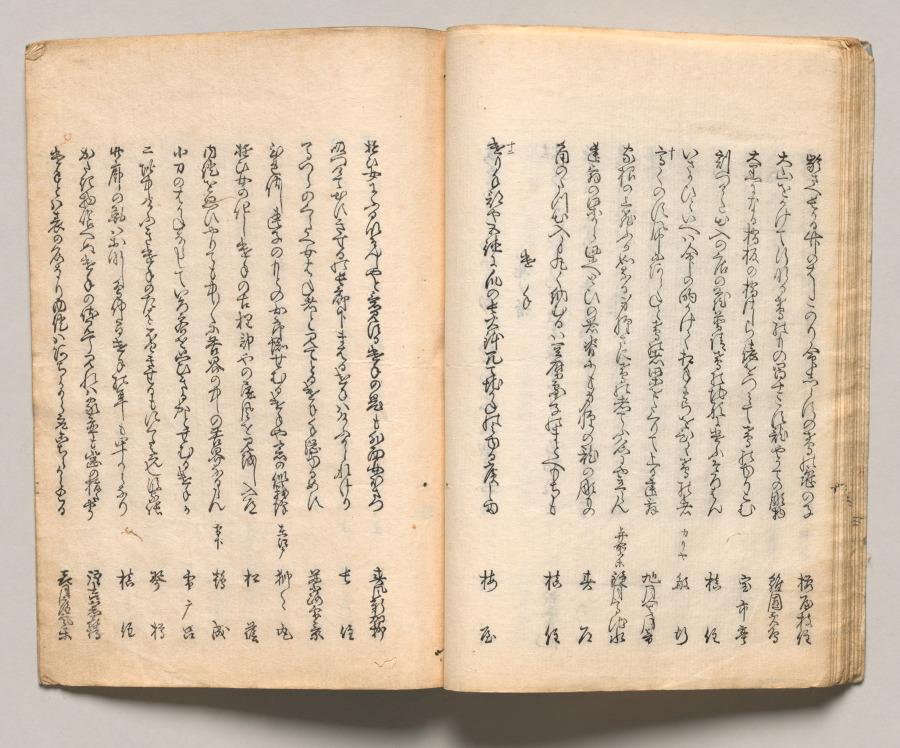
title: Spread Eighteen from Volume Two of People of Japan in Light Verse (Kyōka)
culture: Japan, Edo period (1615–1868)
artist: Utagawa Hiroshige (Japanese, 1797–1858)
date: 1857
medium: Woodblock-printed book; ink and color on paper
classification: Bound Volume